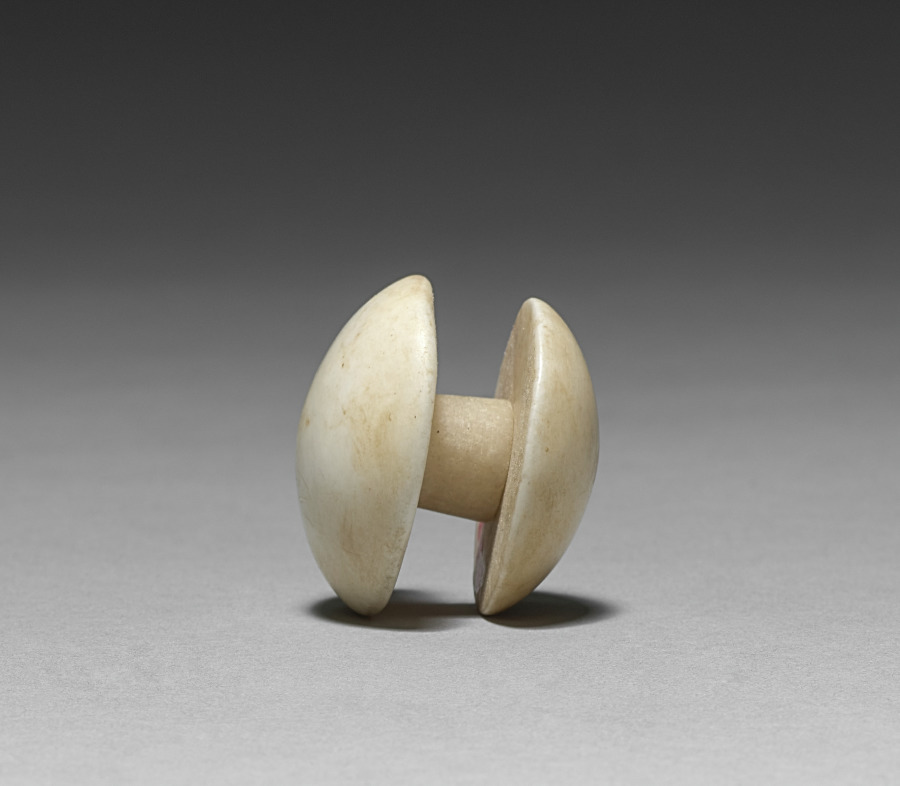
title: Pair of Earrings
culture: Egypt, New Kingdom (1540–1069 BCE), Dynasty 18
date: 1540–1296 BCE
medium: travertine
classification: Jewelry